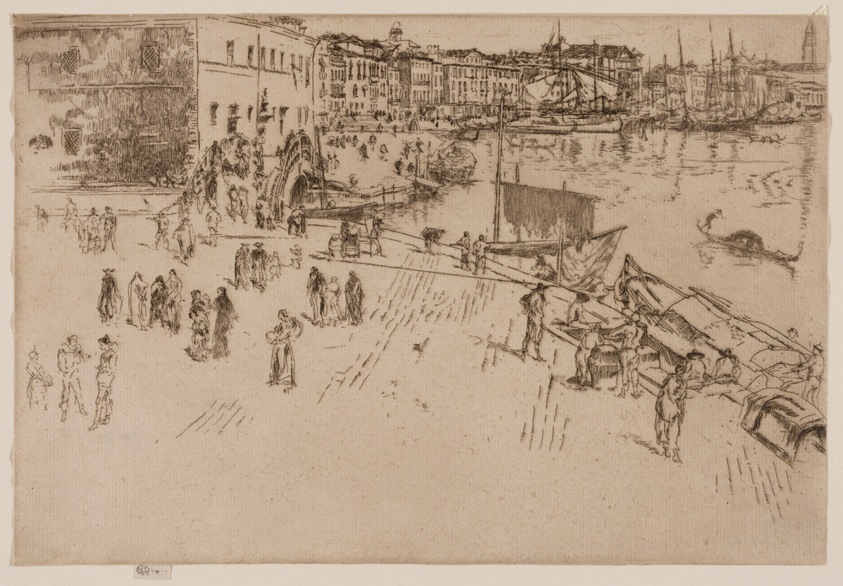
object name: Print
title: The Riva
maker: James McNeill Whistler (American, 1834-1903)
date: 1879/80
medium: Etching and drypoint with foul biting in dark brown ink on ivory laid paper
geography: United States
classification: etching; foul biting; print; prints and drawing; drypoint; paper